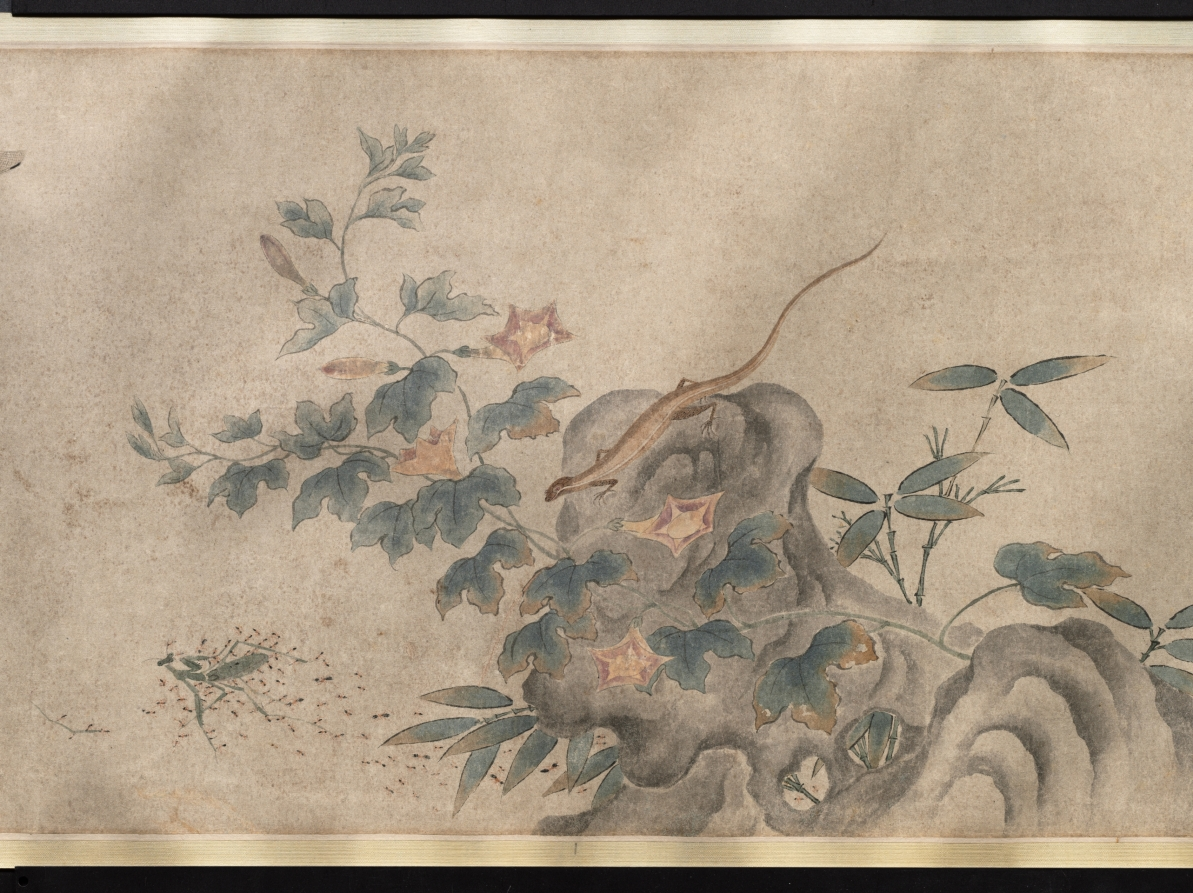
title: Insects and Flowers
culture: China, Qing dynasty (1644-1911) or Republican period (1912-49)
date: c. 1900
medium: Handscroll, ink and color on paper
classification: Painting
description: More than 26 feet long, this scroll presents insects, reptiles, and plants in delicate brushwork and pale colors, referring in style to earlier Southern Song dynasty (1127–1279) bird-and-flower paintings. Upon closer inspection, ants dismember a butterfly and reptiles wait to ambush their prey. An inscription at the end of the painting gives us an idea of its meaning: Attributed to the Qing dynasty scholar Zhang Xigeng (張錫庚, 1801–1861), the inscriber relates the work to an earlier painting by Qian Xuan (錢選, c. 1235–before 1307) and further suggests that the painting may allude to the relentlessness of natural selection. By drawing a parallel to tumultuous episodes in Chinese history, the writer might even hint at the domestic rebellions and the aggression of Western powers against China in his lifetime, particularly the Opium Wars (1839–60).